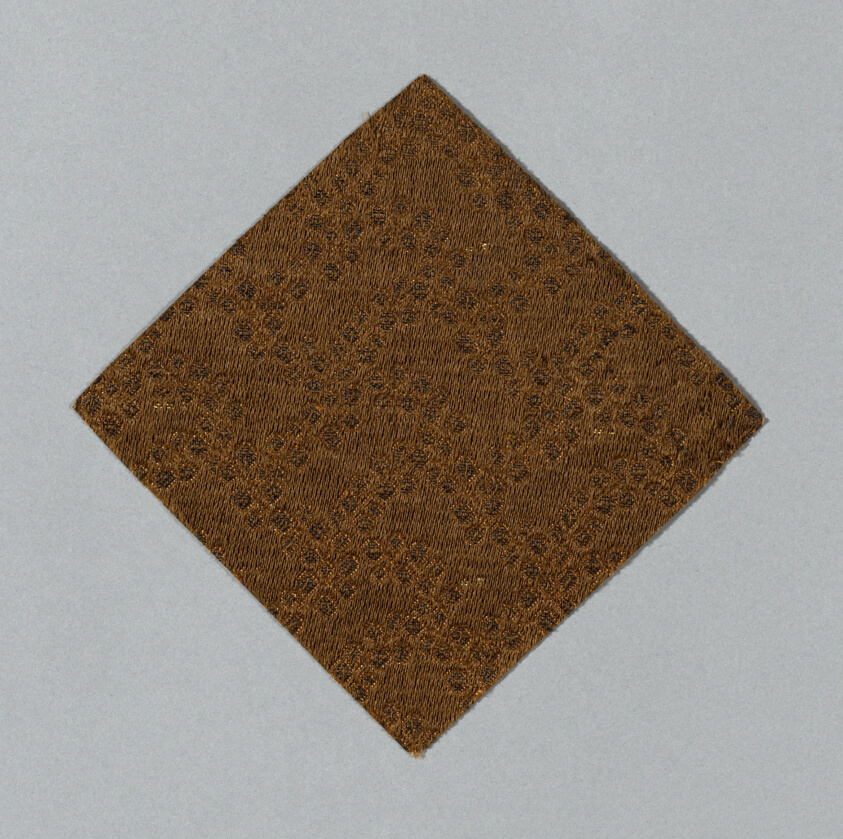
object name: Textile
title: Fragment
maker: Japan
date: Edo period (1615–1868), 1725/75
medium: Silk, satin weave with silk and gilded paper strip supplementary brocading wefts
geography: Japan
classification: textile; weaving